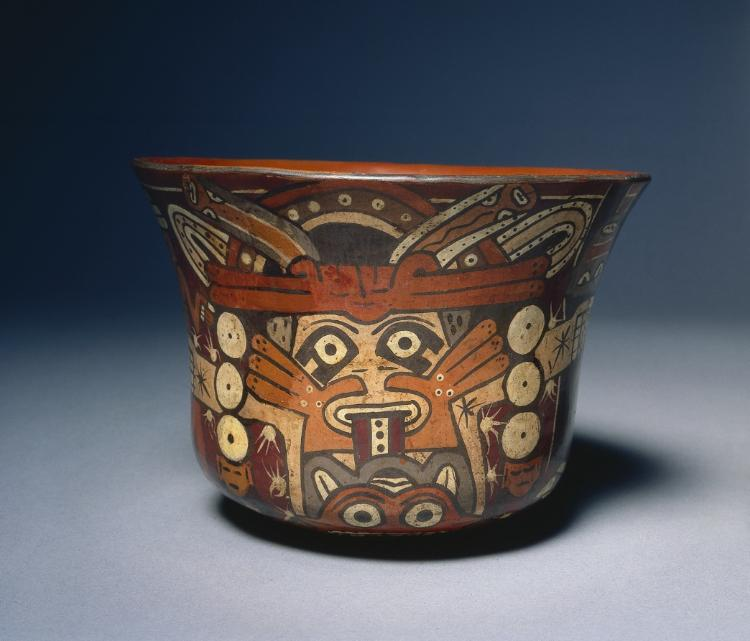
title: Bowl with Costumed Being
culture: Peru, South Coast, Nasca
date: 100 BCE–700 CE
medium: earthenware with colored slips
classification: Ceramic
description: Supernatural figures like the one on this bowl are shown wearing ornaments that actually exist-like the nearby Mouth Mask-they may represent humans clothed as deities who served as living cult images during rituals. The figure holds a severed head that probably alludes to capture of an enemy’s life force, since severed heads and fertility are linked in Nasca art.